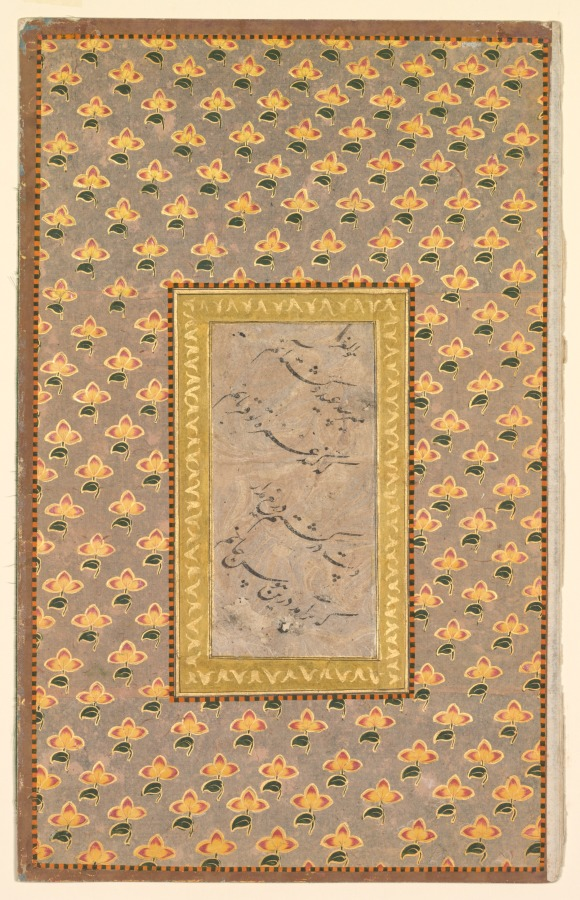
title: Calligraphy (verso)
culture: India, Mughal, 17th century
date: c. 1650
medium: Gum tempera, ink, and gold on paper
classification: Calligraphy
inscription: verso: a Persian quatrain in nast 'aliq calligraphy in black ink on marbled paper. The Feast is approaching, and I am dying for/ Your coquetry to make a sacrifice of me./ Do not hold back from killing me:/ For that very wish I have given up my soul.